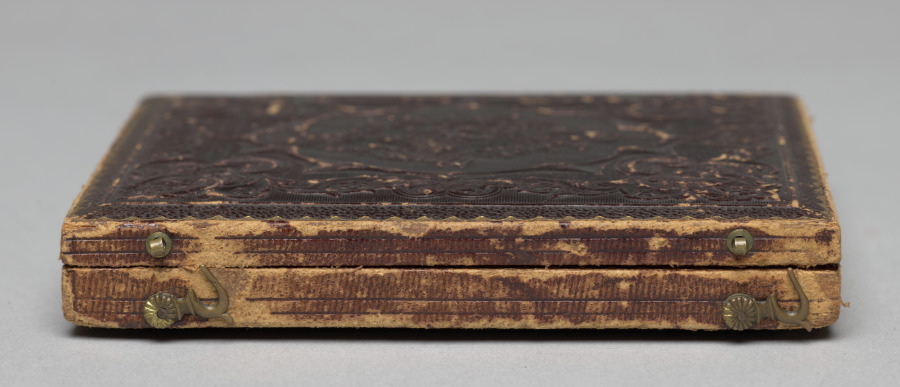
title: Three Carpenters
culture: America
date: c. 1858–65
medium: ambrotype, quarter plate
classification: Photograph